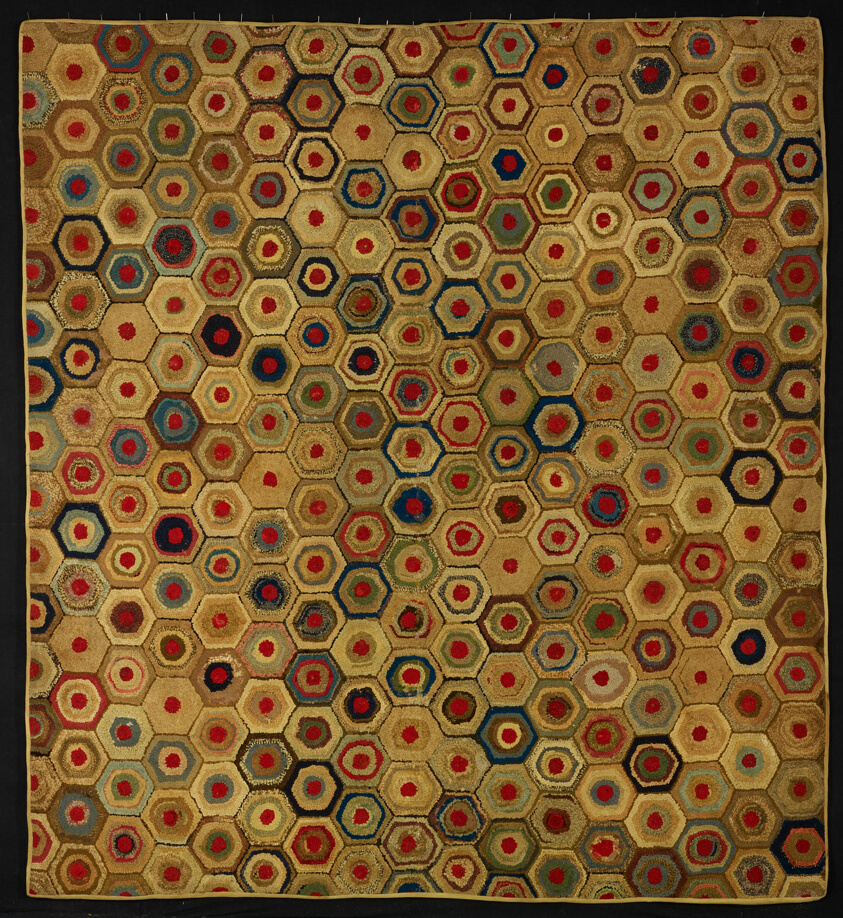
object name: Textile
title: Rug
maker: United States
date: 1860/1935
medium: Jute, plain weave with cotton and wool yarn, felted, knitted and woven strips forming "hooked" pile; edged with cotton, twill weave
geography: United States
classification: textile; needlework - rug